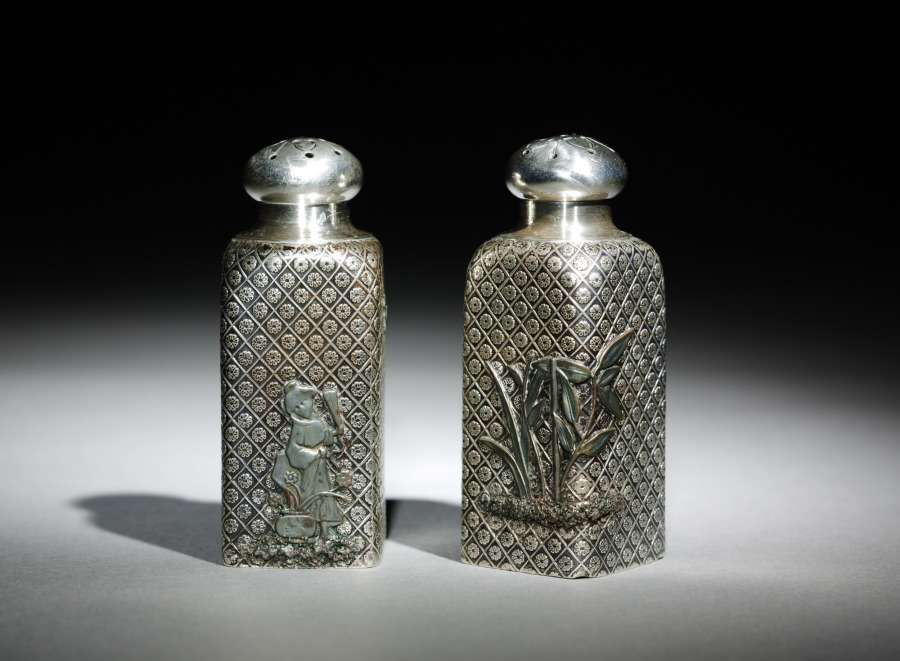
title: Salt and Pepper Shakers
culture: America, Rhode Island, Providence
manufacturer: Gorham Manufacturing Company (America, est. 1831)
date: c.1875–85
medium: silver and mixed metals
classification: Silver